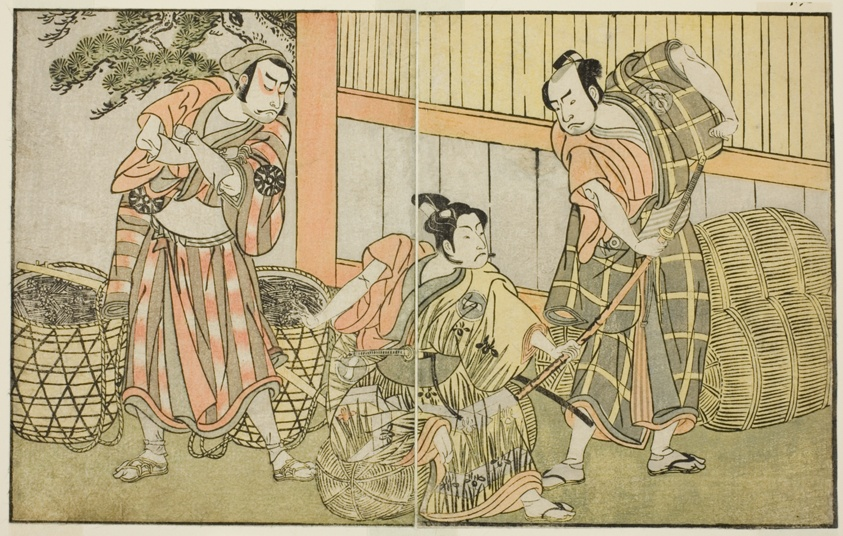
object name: Print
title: The Actors Kasaya Matakuro II as Hagun Taro (right), Ichikawa Monnosuke II as Izutsu no Suke Narihira (center), and Nakamura Nakazo I as Kose no Kanaoka Disguised as Sogoro the Charcoal Maker, in the Play Kuni no Hana Ono no Itsumoji, Performed at the Nakamura Theater in the Eleventh Month, 1771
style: Japanese (culture or style)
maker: Katsukawa Shunsho 勝川 春章; Japanese, 1726-1792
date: c. 1772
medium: Color woodblock print; from the illustrated book Yakusha Kuni no Hana (Prominent Actors of Japan)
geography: Japan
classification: woodblock print; print; asian art